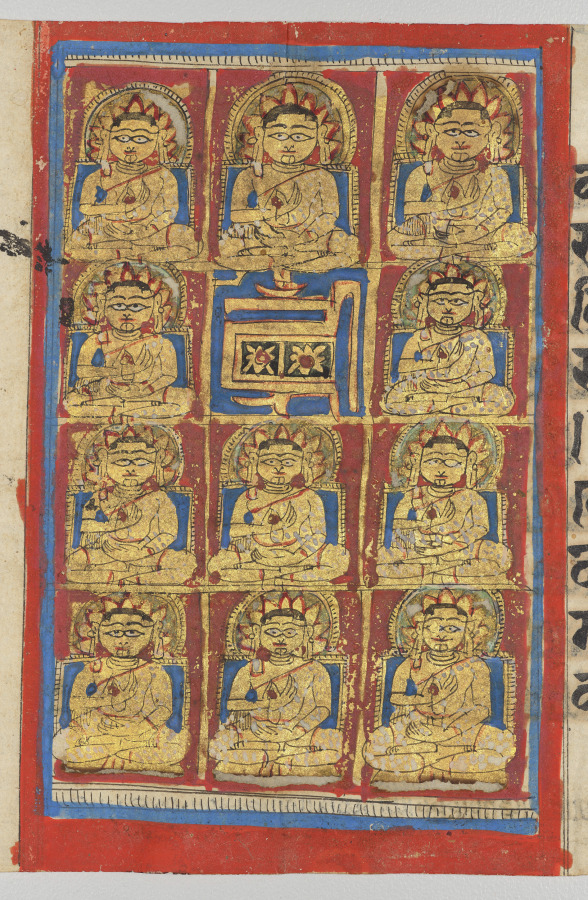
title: The Eleven Principal Disciples (Ganadharas) of Mahavira, Folio 57 (verso), from a Kalpa-sutra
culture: Western India, Gujarat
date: c. 1475–1500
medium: Gum tempera, ink, and gold on paper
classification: Painting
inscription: [[upper left]] gaṇadhara 11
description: The founder of Jainism, Mahavira, had 11 main disciples, all depicted as identical to one another. They all sit in a meditative posture, with the left hand in the lap, while the right hand is in the gesture of teaching. They each have shaven heads, elongated earlobes, and white robes, indicating that this manuscript was used by the Shvetambara (White Clad) sect. In the upper central grid, decorated with flowers, is a stylized om-hrim, mystic syllables visually combined to invoke the essence of all Jain teaching.